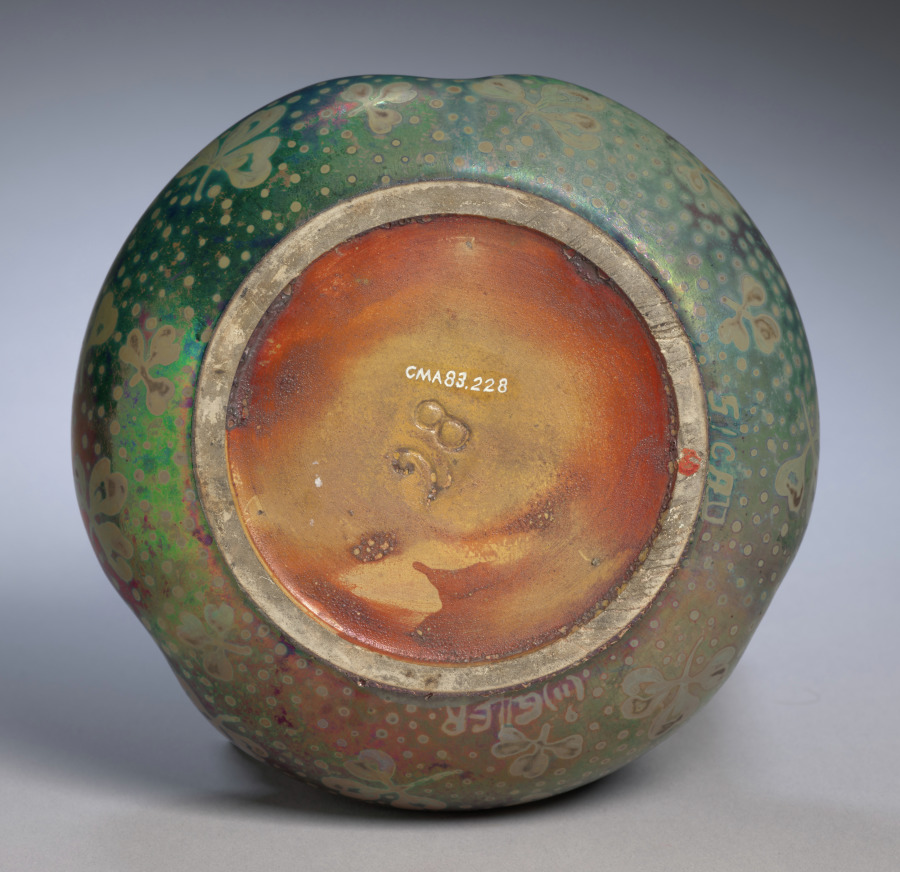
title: Bowl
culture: America, Ohio, Zanesville, early 20th Century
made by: Weller Pottery (American)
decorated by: Jacques Sicard (French, 1865–1923)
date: early 1900s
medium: earthenware decorated with lustre glazes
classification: Ceramic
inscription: inscribed on side near bottom: "SICA(?)D WELLER." Incised at center of bottom: 28.